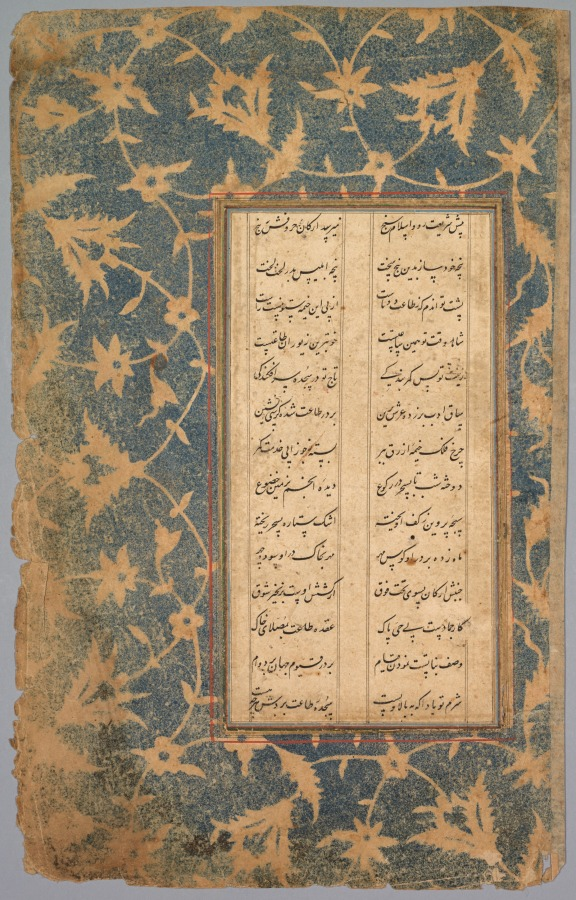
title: School Exercise Alphabet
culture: India, Mughal Dynasty (1526-1756)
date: 18th century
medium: ink on paper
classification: Manuscript